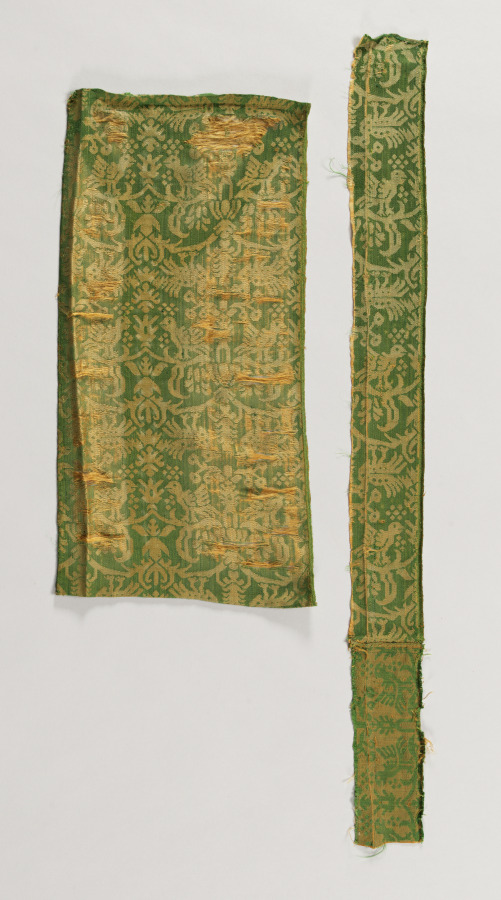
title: Fragments of Silk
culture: Spain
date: early 1600s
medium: silk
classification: Textile